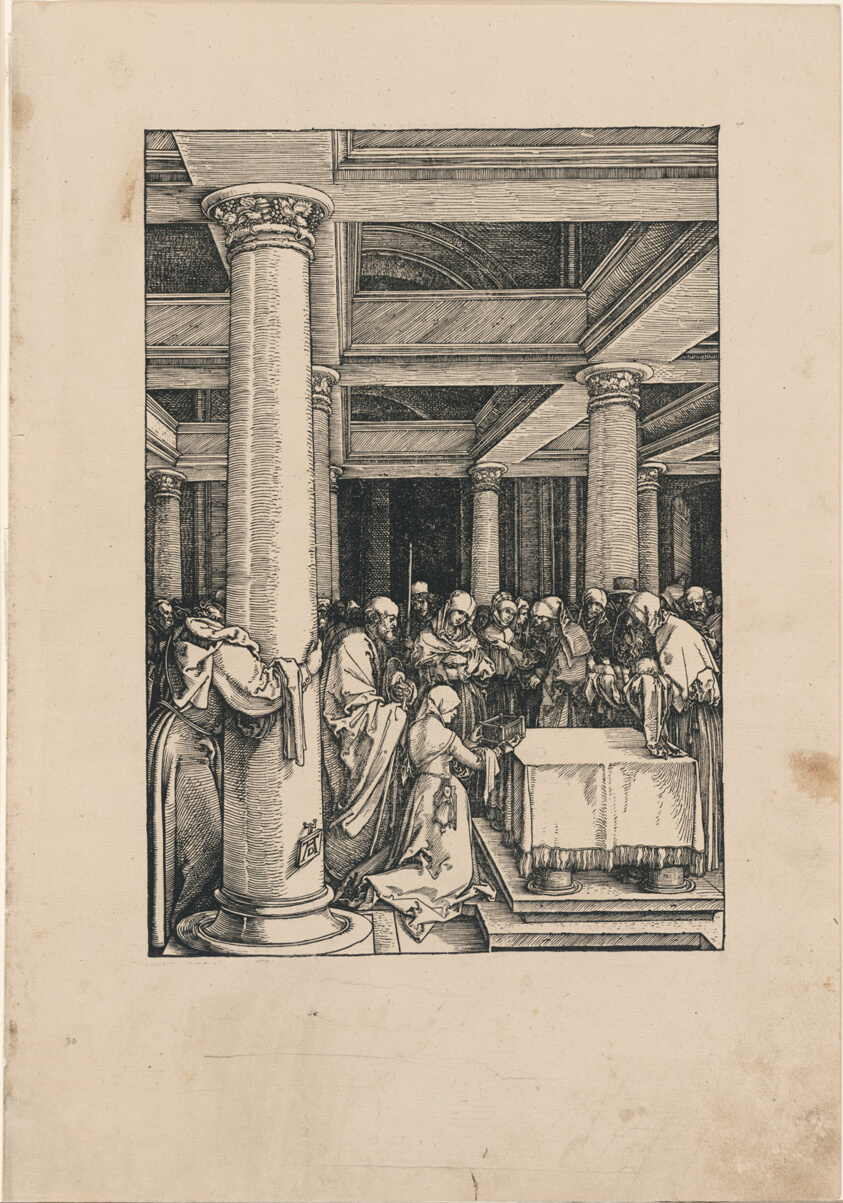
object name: Print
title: The Presentation of Christ in the Temple, from The Life of the Virgin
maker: Albrecht Dürer (German, 1471-1528)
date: c. 1505, published 1511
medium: Woodcut in black on tan laid paper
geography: Germany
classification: woodcut; print; prints and drawing; paper